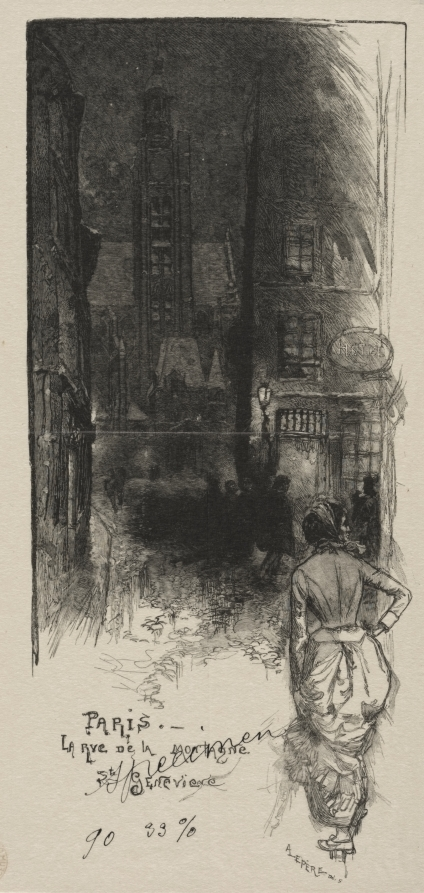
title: Rue de la Montagne, St. Geneviève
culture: France, 19th-20th century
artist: Auguste Louis Lepère (French, 1849–1918)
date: 1886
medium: wood engraving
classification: Print